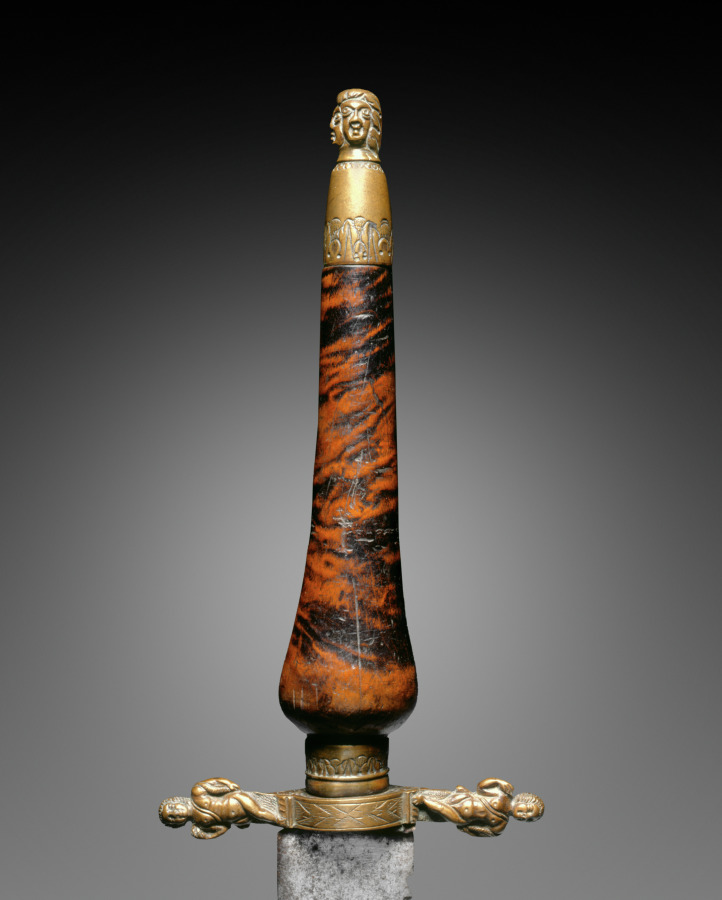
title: Officer's Plug Bayonette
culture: England, 17th century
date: c.1690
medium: steel serrated blade, brass, and wood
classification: Arms and Armor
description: Used increasingly in warfare during the 1600s, the plug bayonet was inserted into the muzzle of a gun to make a weapon with a long shaft. This eventually made the use of pikemen in warfare obsolete as the new musketeer could now continue after having run out of shots.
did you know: The owner's or maker's mark on this blade is unidentified.